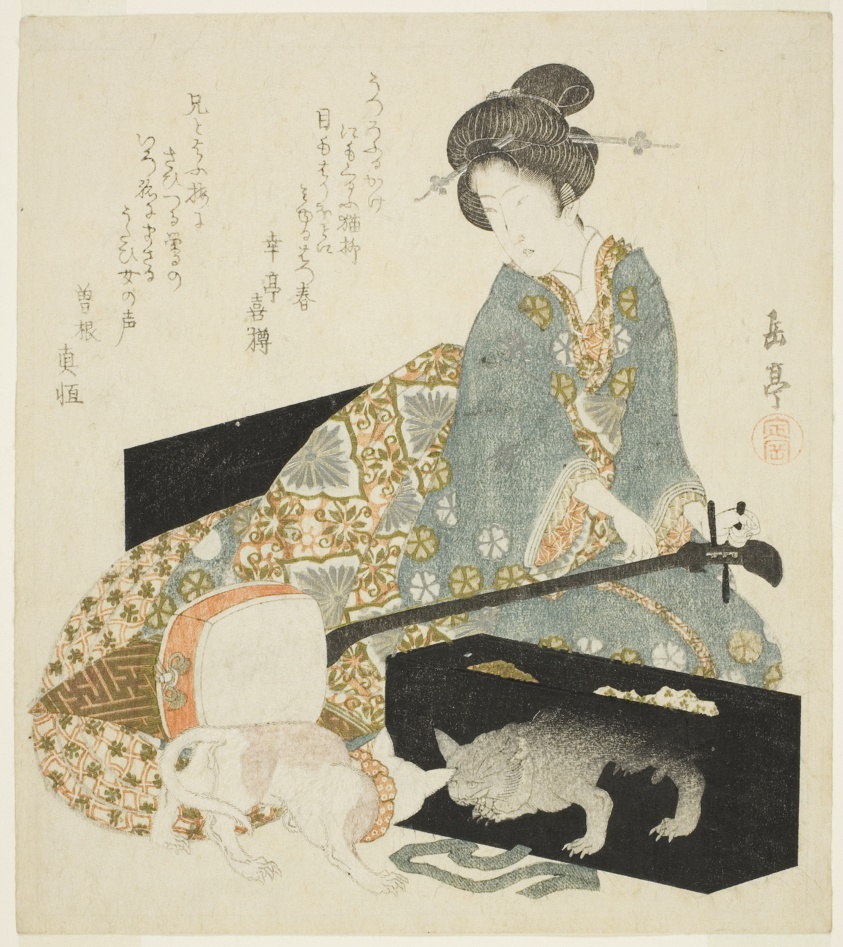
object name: Print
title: Woman with Shamisen and Cat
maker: Yashima Gakutei (Japanese, 1786 (?)-1868)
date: c. 1820s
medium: Color woodblock print; shikishiban, surimono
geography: Japan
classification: woodblock print; print; asian art